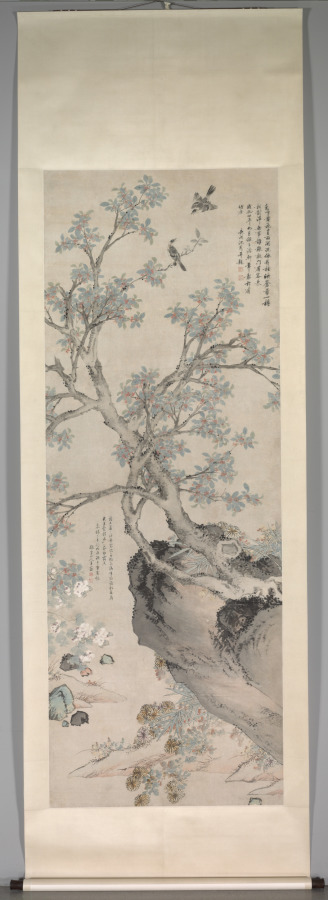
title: Yellow Chrysanthemums and Red Osmanthus in the Style of Wang Yuan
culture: China, Ming dynasty (1368–1644)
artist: Shen Zhou (Chinese, 1427–1509)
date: 1468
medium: hanging scroll, ink on paper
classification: Painting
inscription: Artist's inscription, signature, and 2 seals at upper right: Beneath the fence yellow [chrysanthemum] flowers brave the rain to blossom;/ Still others lean on the red osmanthus tree and dazzle the deep green moss./ With a goblet [of wine] I face them, entirely without concern;/ Who will answer the knocking at the gate where a guest has arrived? In the ninth month of the fourth year of the Chenghua era [1468], I followed the brush-conception of Wang Danxuan 王澹軒 [Wang Yuan 王淵] at the Youzhuzhuang 有竹庄 [House with Bamboo]. Inscribed and [painted] by Shen Zhou 沈周 of Changzhou 長洲. [seals] Shitian 石田; Shen shi Qinan 沈氏启南. trans. HR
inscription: 1 additional inscription, dated 1523, and 2 seals of Wang Chong 王寵 (1494-1533).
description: Shen Zhou, a native from Suzhou, was descended from a prominent land-owning family with strong ties to literati culture. Because Shen Zhou never entered government service, he had ample opportunity to cultivate the arts of painting, poetry, and calligraphy. Chrysanthemums and red osmanthus both bloom in autumn. The deep orange osmanthus flowers emanate a characteristically sweet fragrance. According to his inscription on the painting, Shen Zhou sought to imitate the style of the Yuan dynasty (1271–1368) painter Wang Yuan. His color-filled brushstrokes and washes, however, anticipate the flower painting style of Yun Shouping, whose Peonies are also in the Cleveland Museum of Art collection, https://www.clevelandart.org/art/1967.192. The sheer size and complex composition of this scroll are impressive.